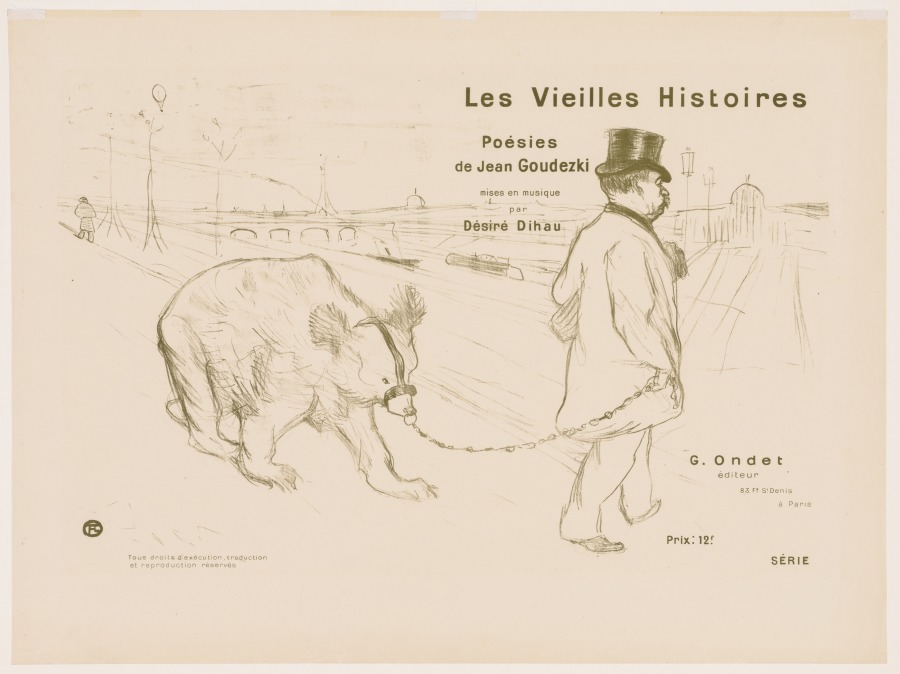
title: Les Vieilles histoires: Couverture - Frontispiece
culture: France, 19th century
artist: Henri de Toulouse-Lautrec (French, 1864–1901)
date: 1893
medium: lithograph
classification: Print